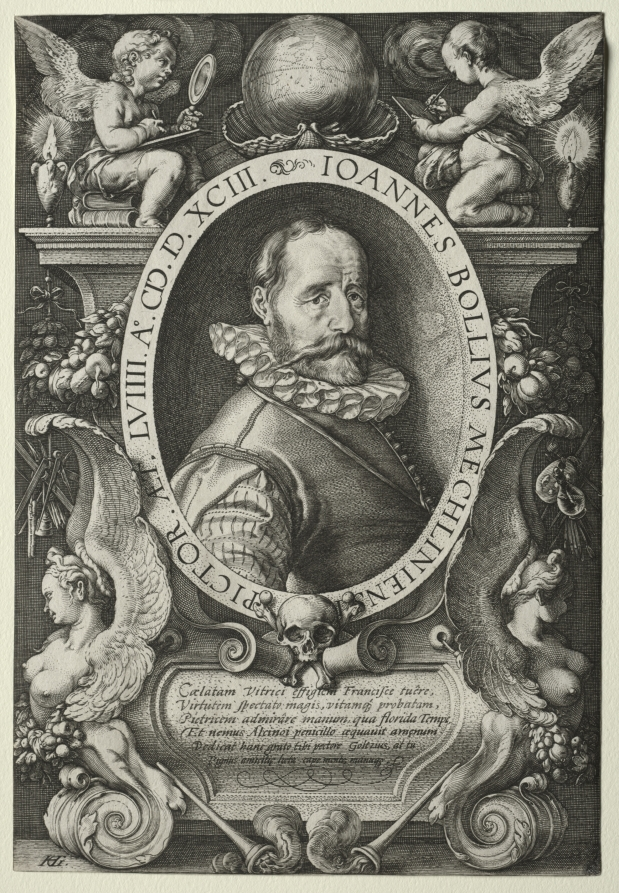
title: Hans Bol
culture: Netherlands, 16th century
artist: Hendrick Goltzius (Dutch, 1558–1617)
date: 1593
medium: engraving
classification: Print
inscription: lower center, in plate: Cælatam vitrici effigiem Francisce tuêre, / Virtutem spectato magis, vitamque probatam, / Pictricem admirâre manum, qua florida Tempe, / Et nemus Alcinoi penicillo æquavit amaenum / Dedicat hani grato tibi pectore Goltzius, at tu / Pignus amicitiae læte cape mente, manuque. ; Center, in plate (in oval frame around portrait): IONNES BOLLIUS MECHLINIENS[I?] / PICTOR. ÆT. LVIII. A°. CIC(second C reversed). IC(C reversed). XCIII. ; lower left, in plate: HG. [in monogram] ; verso, upper center, in brown ink: Ga[n?]t [2 d J pr: 4d?]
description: Hans Bol (1534–1593) was active in Antwerp as a painter, etcher, and miniaturist. He is shown here at the age of 58, the last year of his life. The skull and the upside-down torches in the ornamental frame are evidence that the engraving was made after Bol's death.